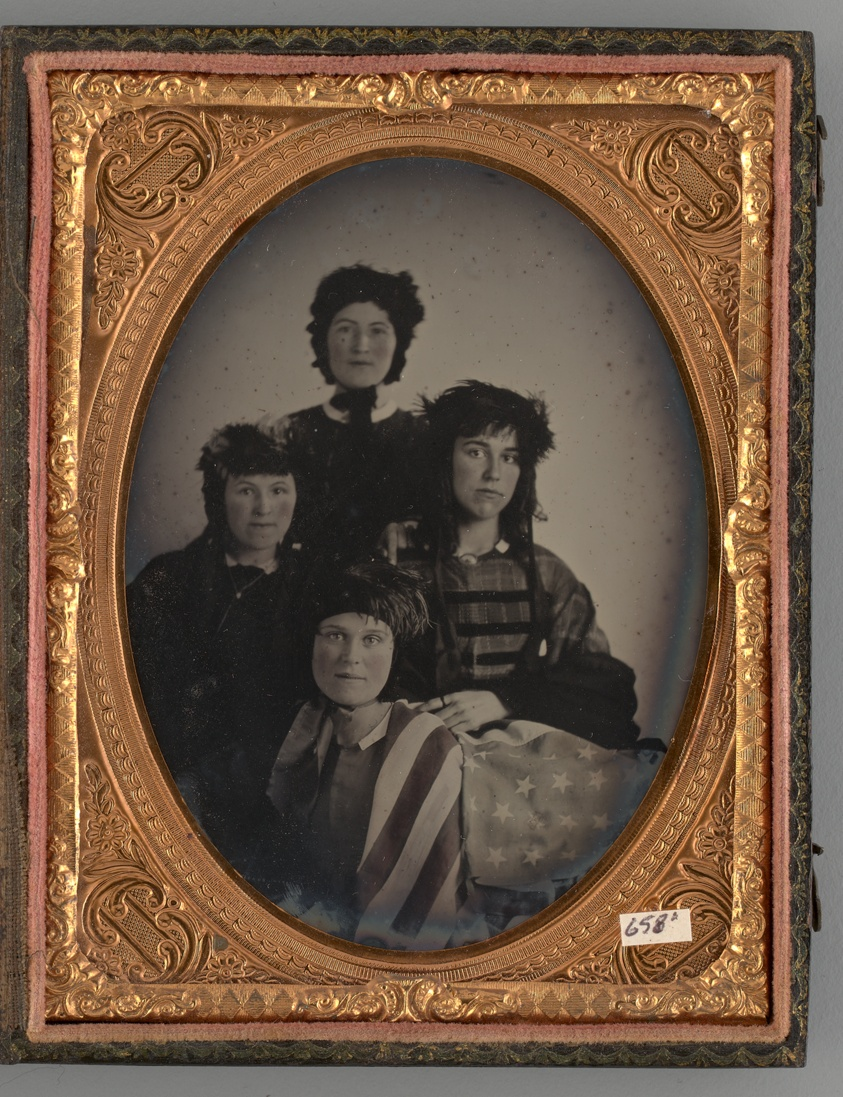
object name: Photograph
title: Untitled (Portrait of Four Women)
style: 19th century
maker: Unknown maker; American, 19th century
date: 1864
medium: Ambrotype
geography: United States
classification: portrait; photograph; photographic process; photography; portrait; ambrotype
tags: lundberg collection, portraits, portraits: female subject, portrait, portraits: multiple subjects